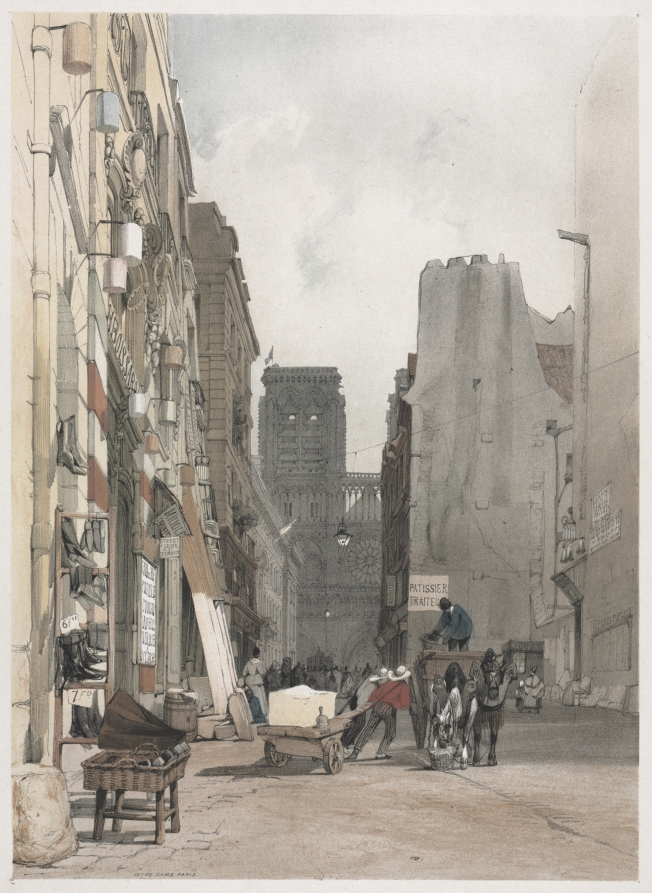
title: Picturesque Architecture in Paris, Ghent, Antwerp, Rouen: Nôtre Dame, Paris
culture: England, 19th century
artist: Thomas Shotter Boys (British, 1803–1874)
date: 1839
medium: lithograph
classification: Portfolio